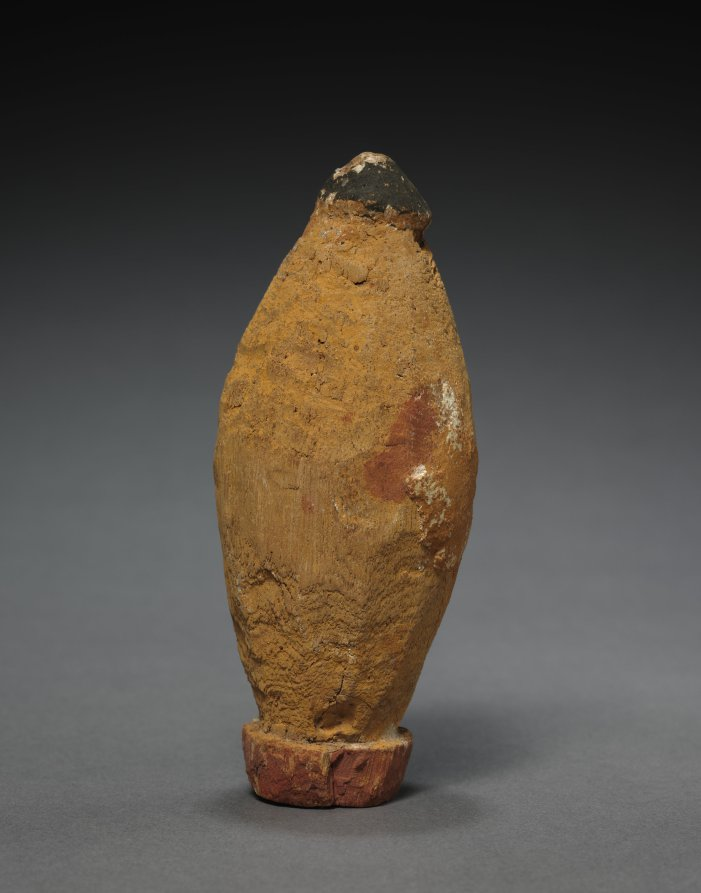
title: Model Storage Vessel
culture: Egypt, Middle Kingdom (2040–1648 BCE), Dynasties 11–12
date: c. 2000–1900 BCE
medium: painted wood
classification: Funerary Equipment